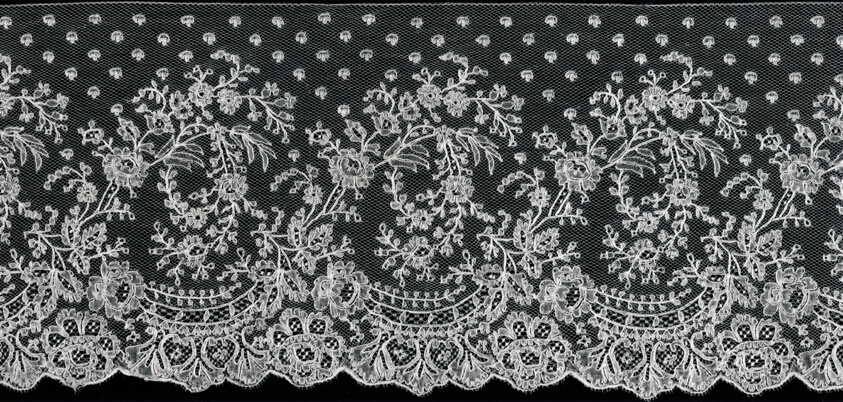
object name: Textile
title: Border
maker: Belgium, Mechlin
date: 1850s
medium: Cotton and linen, bobbin straight lace of a type known as "Mechlin" with a Mechlin mesh ground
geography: Mechelen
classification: textile; lace - bobbin